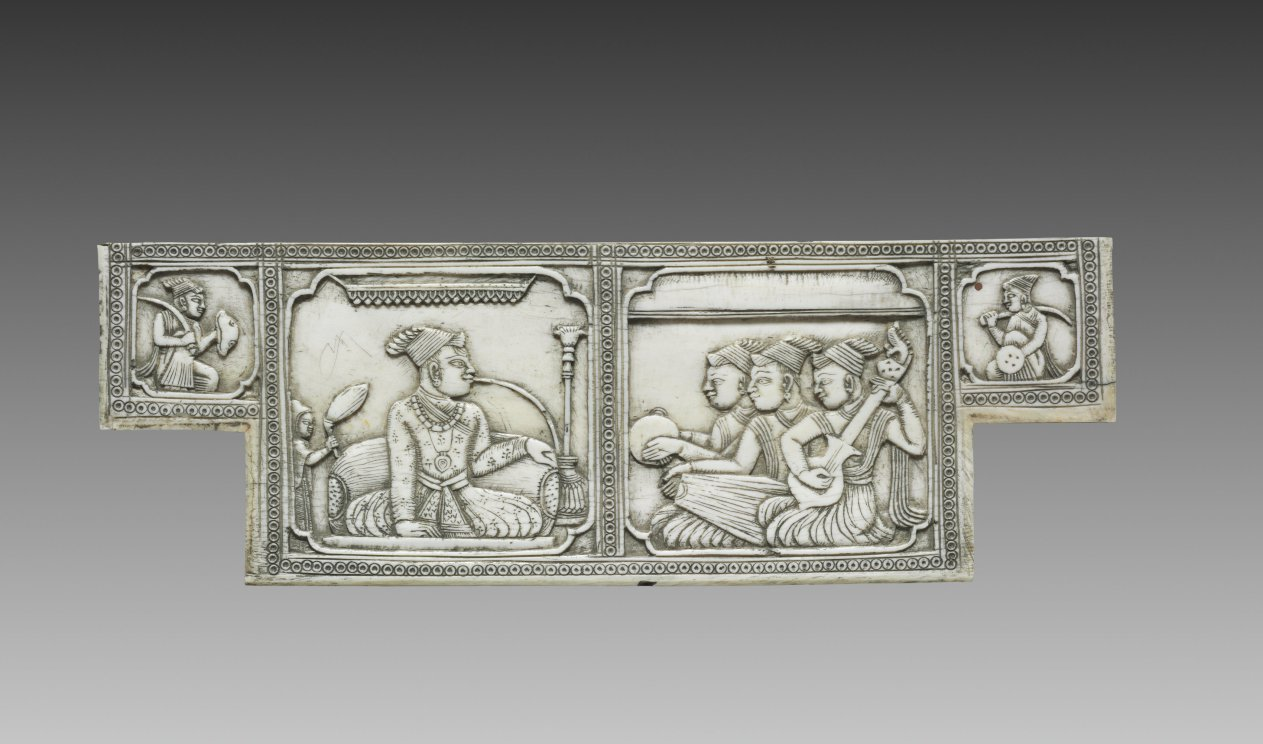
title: Panel from a Box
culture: India, North East Deccan, Visakhapatnam district, Mughal Dynasty (1526-1756)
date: c. 18th Century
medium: ivory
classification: Ivory